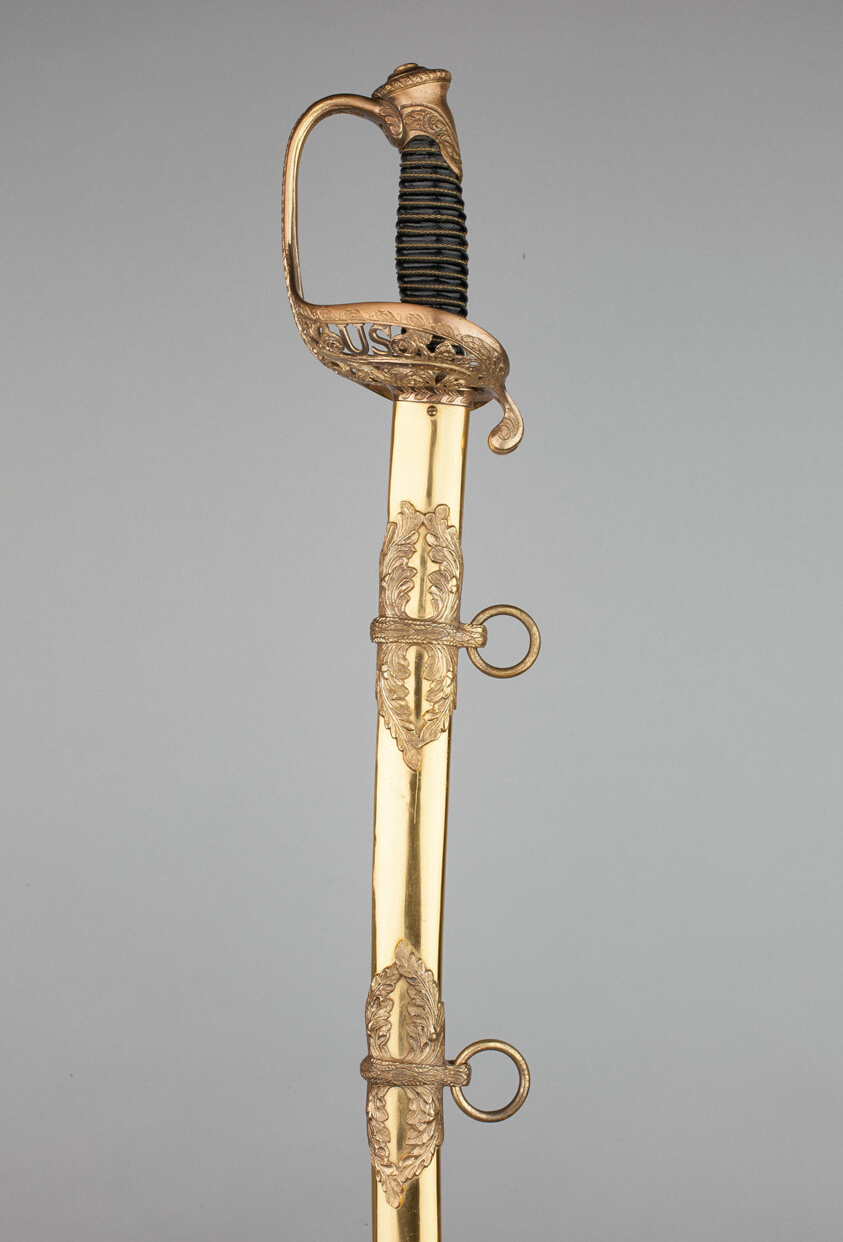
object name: Arms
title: Cavalry Officer's Saber with Scabbard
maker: American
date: c. 1860/65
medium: Steel, wood, and leather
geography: United States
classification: edged weapon-sword; arms; arms and armor